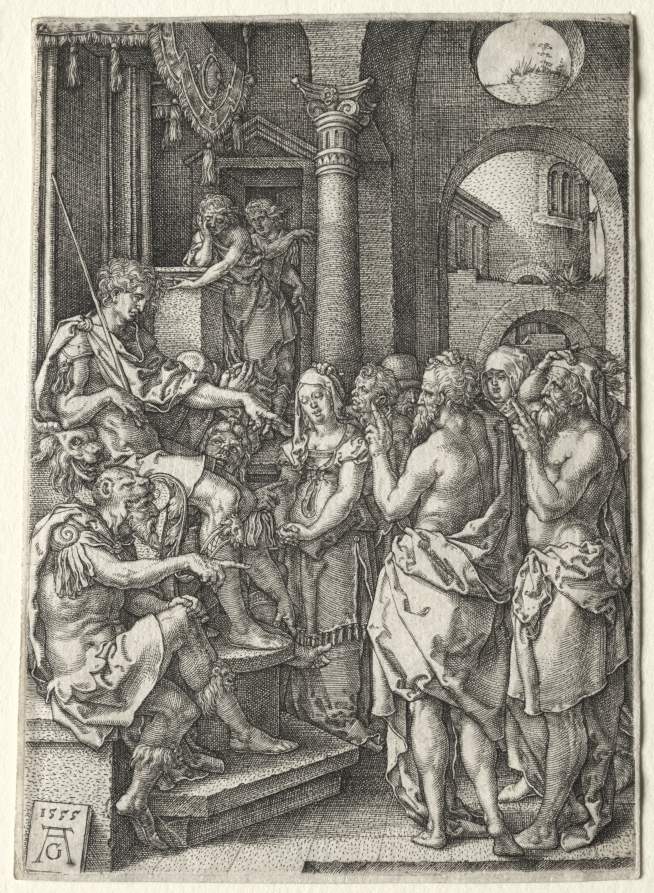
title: The Story of Susanna: Susanna Accused of Adultery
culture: Germany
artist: Heinrich Aldegrever (German, 1502–1555/61)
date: 1555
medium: engraving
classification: Print